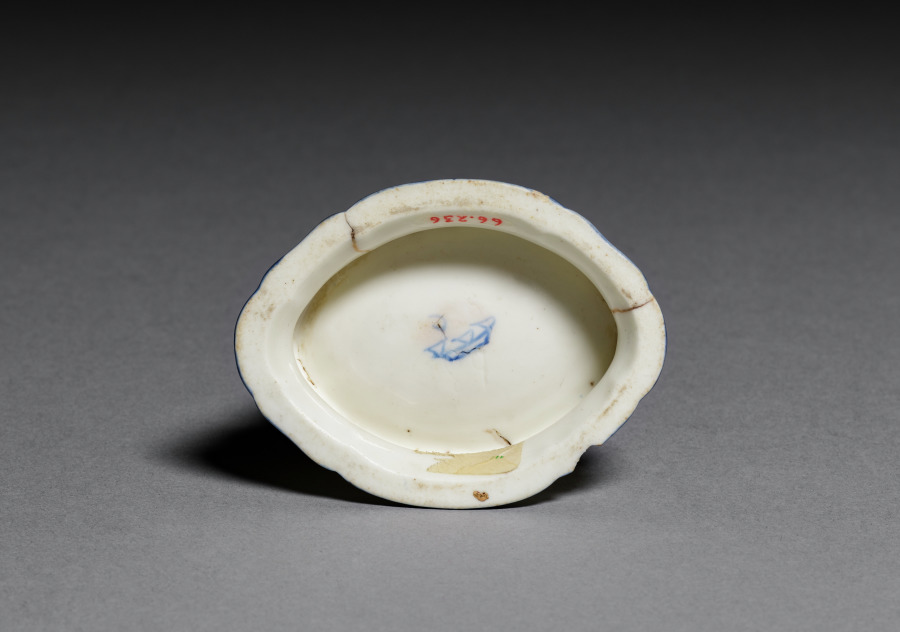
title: Salt Dish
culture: France, Orleans, 18th century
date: c. 1775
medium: soft-paste porcelain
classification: Ceramic